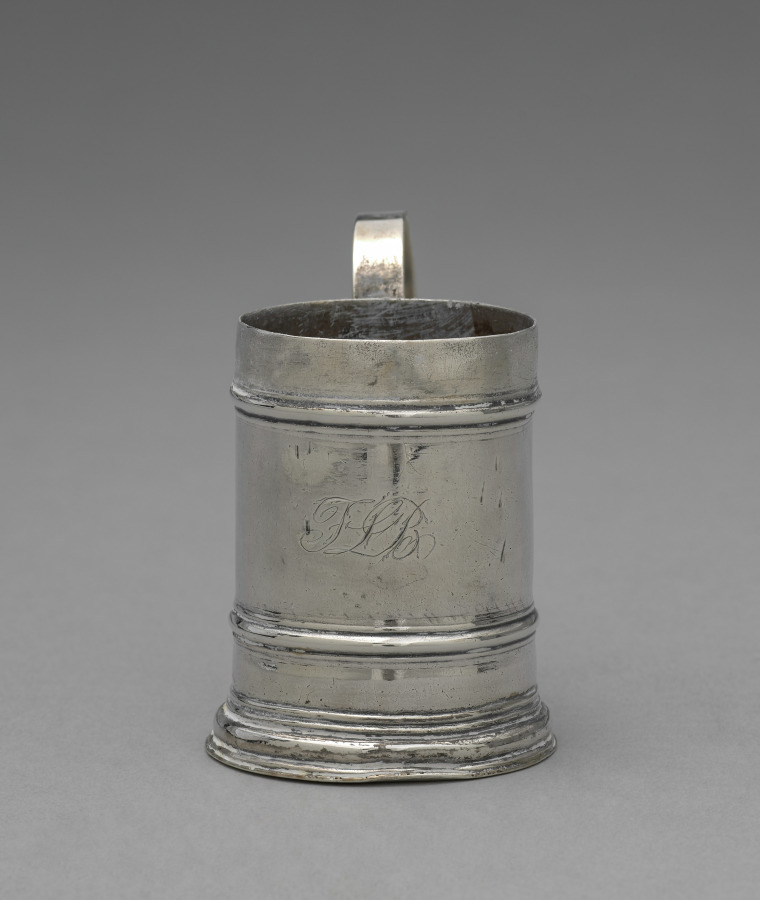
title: Caster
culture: America, Massachusetts, Boston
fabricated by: John Edwards (British)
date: c. 1715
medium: silver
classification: Silver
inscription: engraved "C" over "EE" in shaded block letters on bottom, and "FLB" (later) in bright-cut script on front, opposite handle.